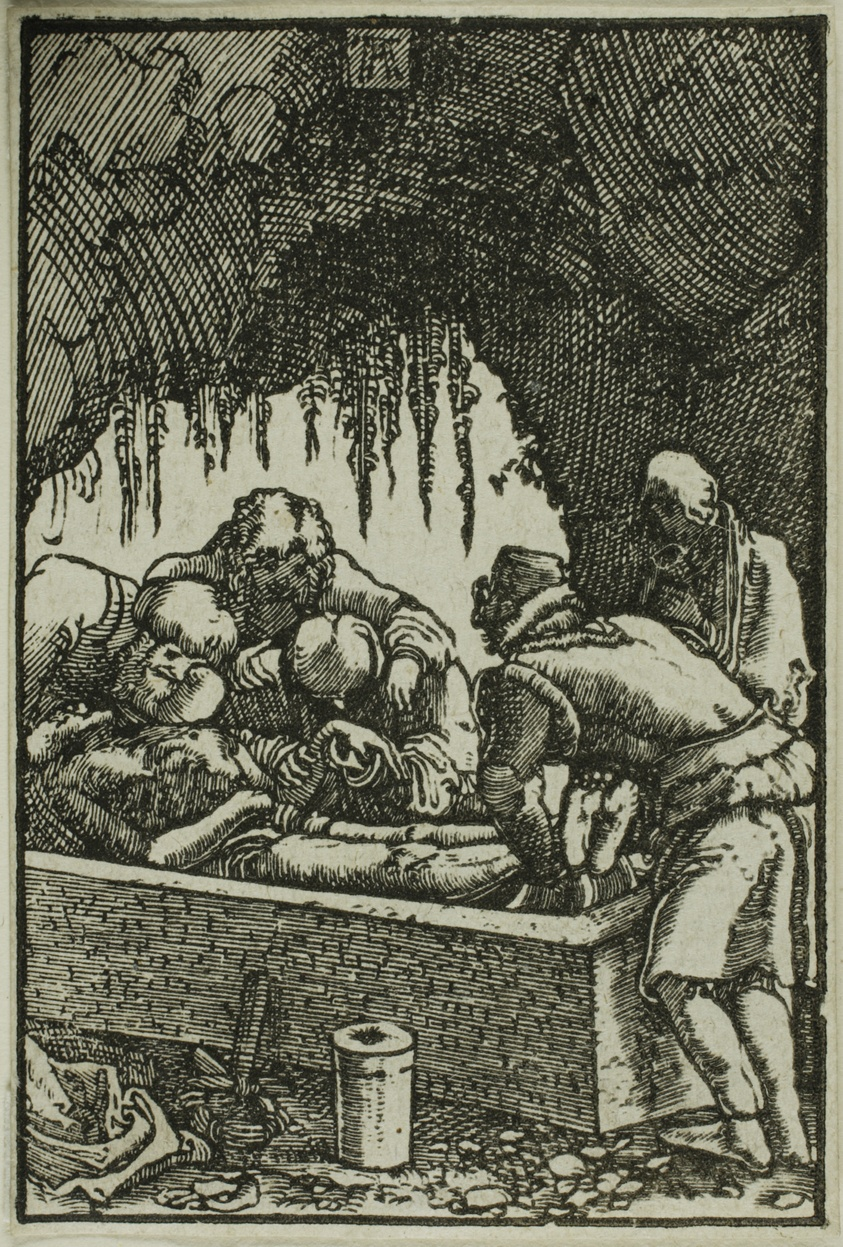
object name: Print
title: The Entombment, from The Fall and Redemption of Man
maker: Albrecht Altdorfer (German, c.1480-1538)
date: 1513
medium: Woodcut in black on ivory laid paper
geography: Germany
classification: woodcut; print; prints and drawing